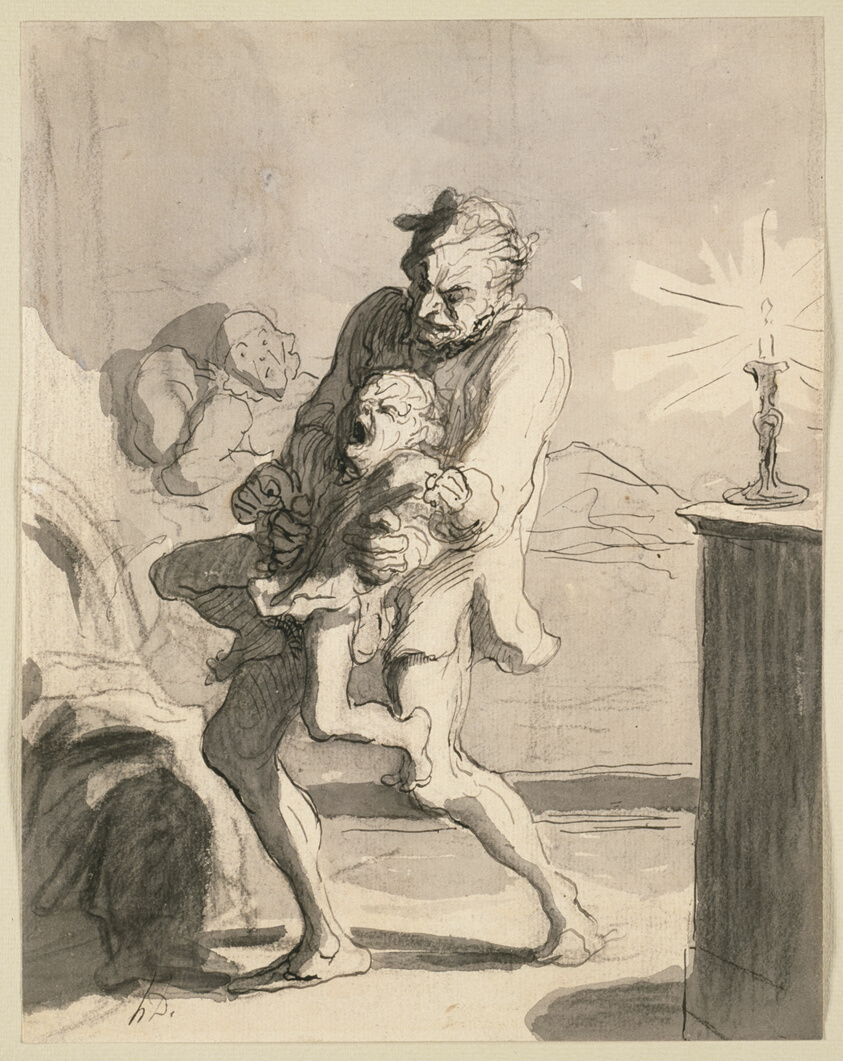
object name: Drawing and Watercolor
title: Fatherly Discipline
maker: Honoré Victorin Daumier; French, 1808-1879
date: 1851/52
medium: Pen and black ink and brush and gray wash, with charcoal, on cream laid paper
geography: France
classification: ink or chalk wash; drawings (visual works); prints and drawing